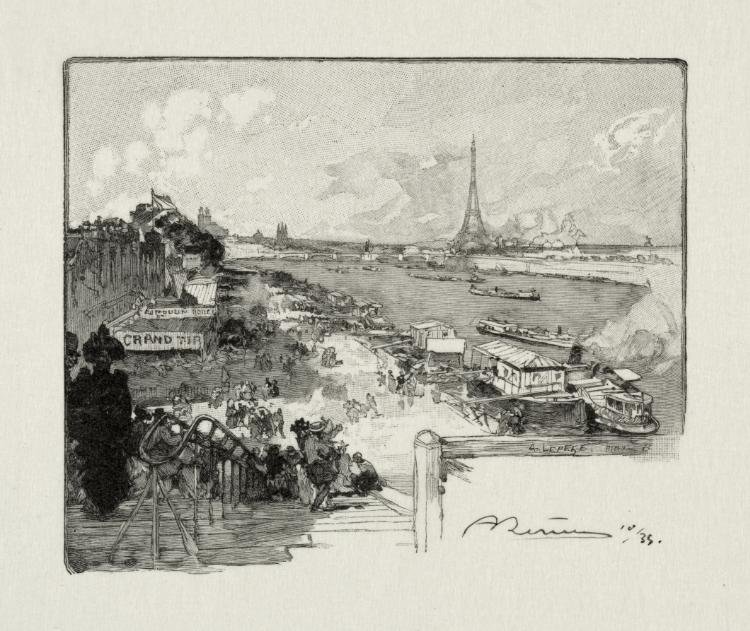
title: Le Point-du-Jour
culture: France, 19th-20th century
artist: Auguste Louis Lepère (French, 1849–1918)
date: 1890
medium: wood engraving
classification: Print